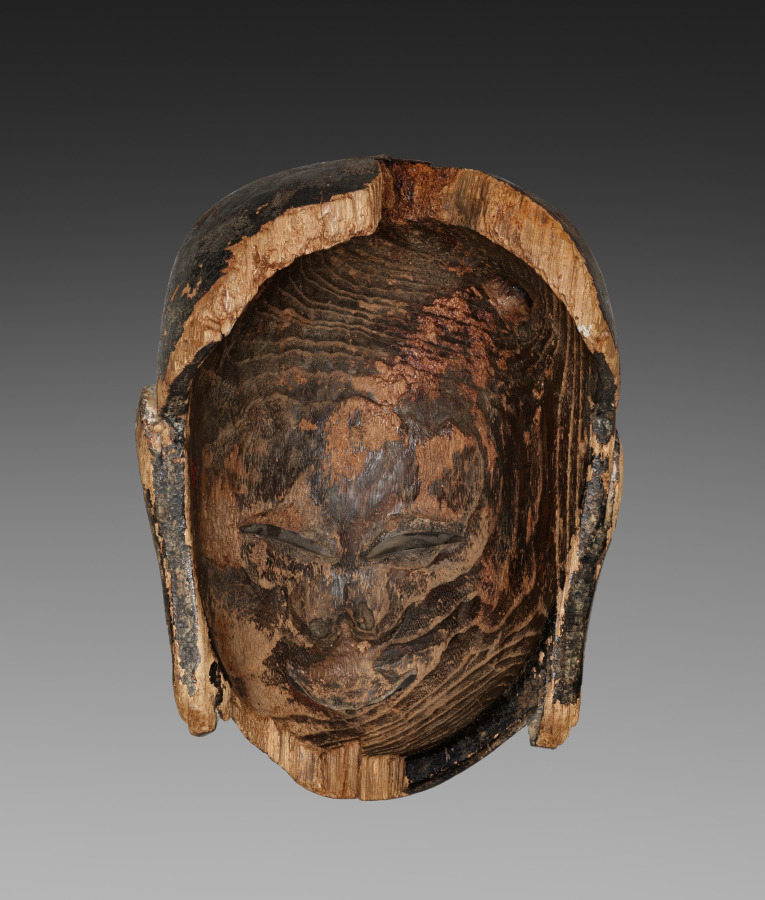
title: Gigaku Mask of Young Persian Boy (Taikōji)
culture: Japan, Nara period (710–94)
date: 710–94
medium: paulownia wood, lacquered and painted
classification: Sculpture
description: This mask is for the role of the son of an old Persian widower in gigaku, a theatrical dance repertoire imported to Japan from continental Asia during the seventh century. The old man and his sons mime prayers to the Buddha. While the mask would cover the entire head of the actor, there are openings for the eyes, nostrils, and mouth.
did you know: This is the mask for one of two sons who accompany a widower in ancient dance theater.